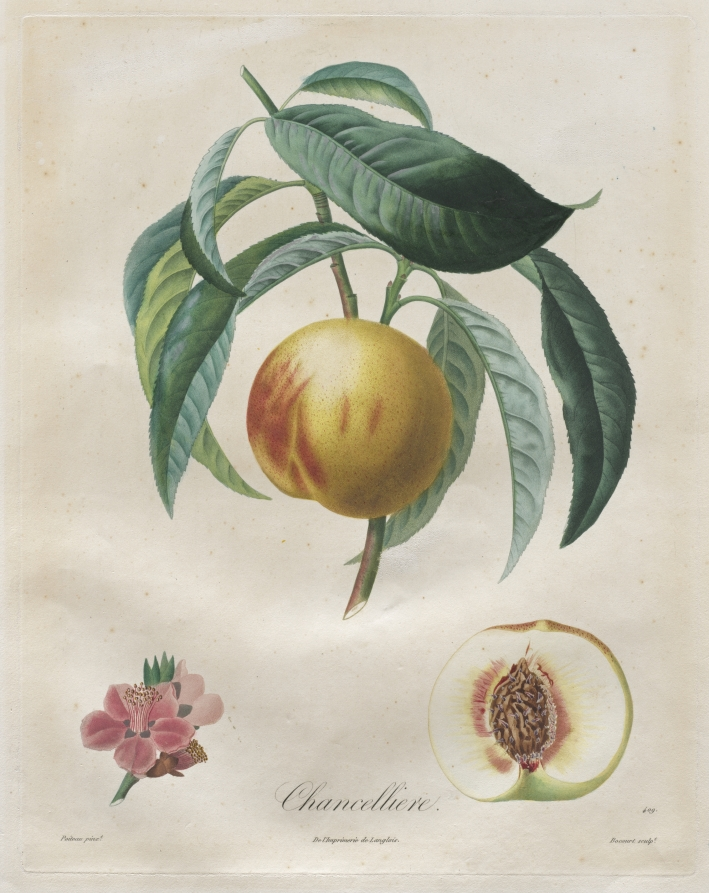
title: Traité des arbres fruitiers: Chancellière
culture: France, 19th century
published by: Henri Louis Duhamel du Monceau (French, 1700–1782)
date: 1808–1835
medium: stipple and line engraving, with hand coloring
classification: Print